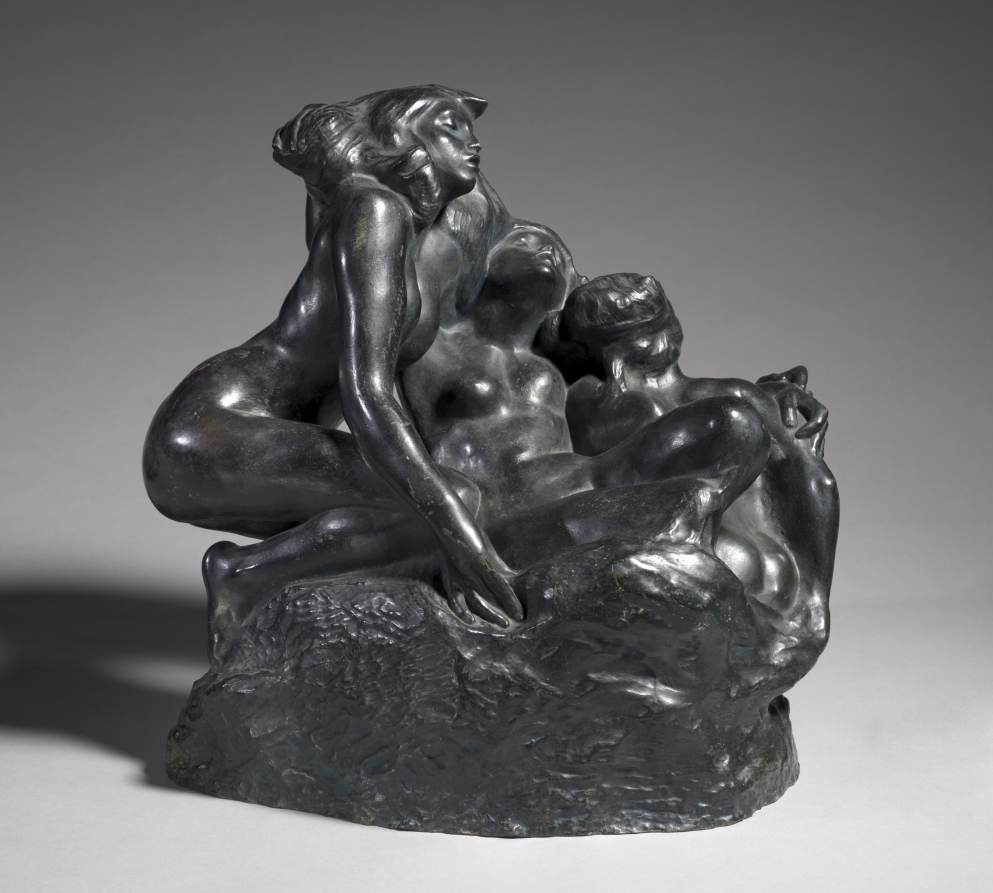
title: The Sirens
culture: France, late 19th-early 20th century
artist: Auguste Rodin (French, 1840–1917)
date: 1889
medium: bronze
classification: Sculpture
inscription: on back: Alexis Rudier/Fondeur 1889, Paris; on inside, separate piece: A. Rodin; on front, left: A. Rodin. Sticker on inside: P. Navez Exposition de Pittsburgh les Syrenes Collection Rodin (du Musée Rodin) No. 131.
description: Rodin intended The Gates of Hell (based on Dante’s The Divine Comedy) to be the great work of his life. It was never executed as originally planned, but Rodin created a number of sculptures for the project that were later treated separately. Among them was this group of three nude women entitled The Sirens.